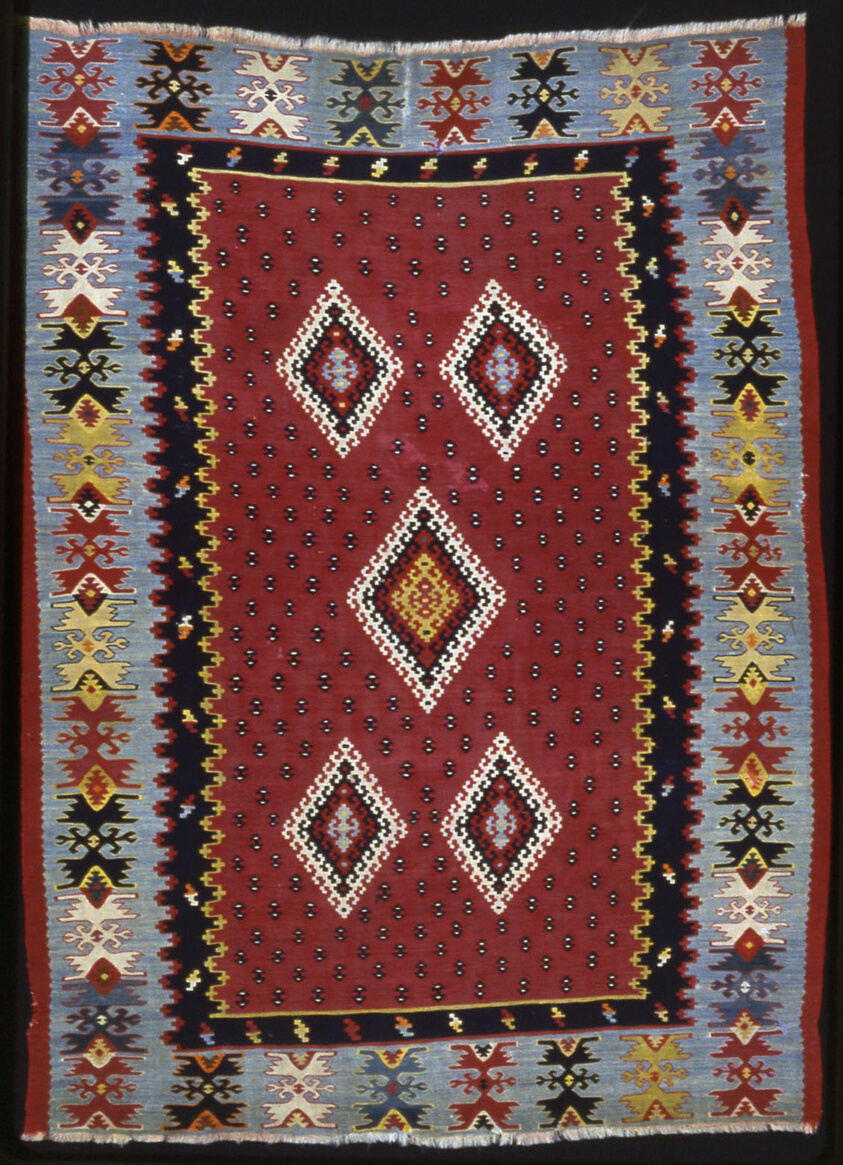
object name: Textile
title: Rug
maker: Turkey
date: 1875/1900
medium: Tapestry-woven kilims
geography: Turkey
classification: textile; needlework - rug; rug; needlework (visual works)